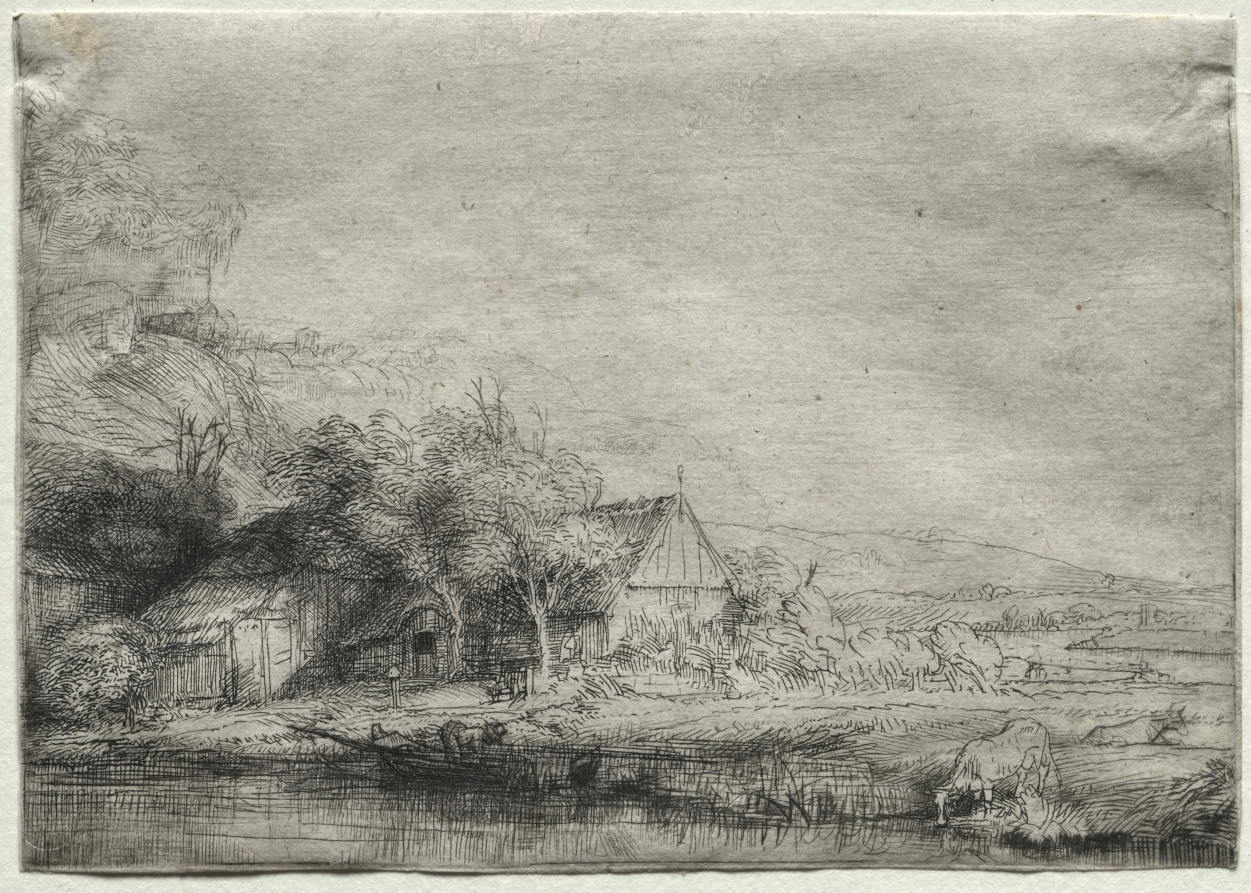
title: Landscape with a Cow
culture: Netherlands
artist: Rembrandt van Rijn (Dutch, 1606–1669)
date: c. 1650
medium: etching and drypoint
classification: Print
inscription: VERSO. center, in graphite: 228 ; lower right, in graphite: 6869 u[underlined]